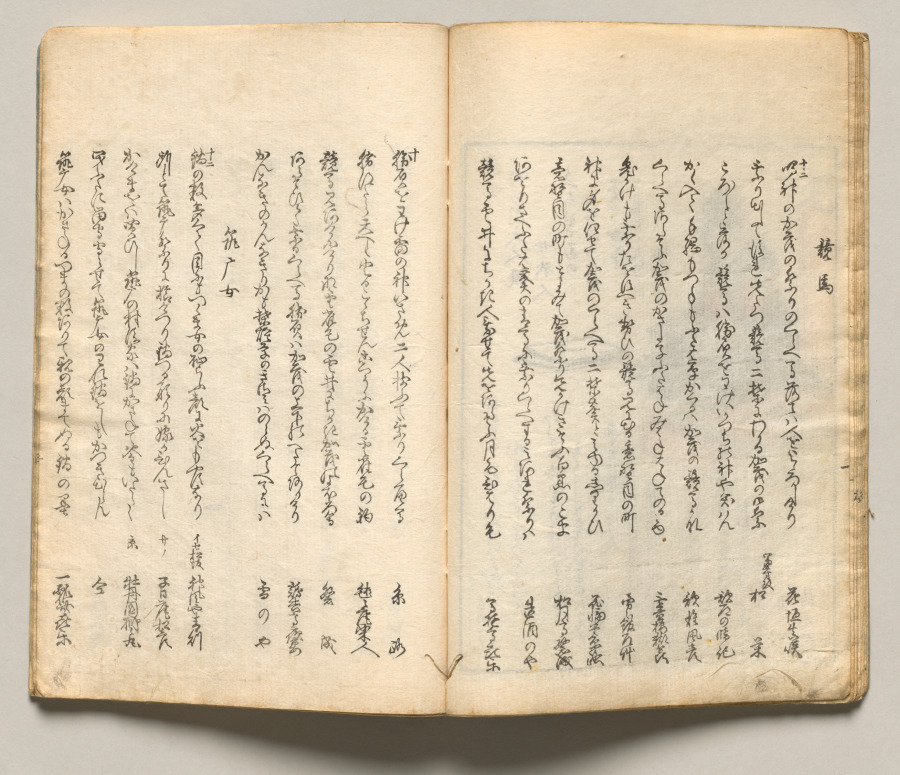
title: Spread Nine from Volume Seven of People of Japan in Light Verse (Kyōka)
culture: Japan, Edo period (1615–1868)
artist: Utagawa Hiroshige (Japanese, 1797–1858)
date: 1857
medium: Woodblock-printed book; ink and color on paper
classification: Bound Volume